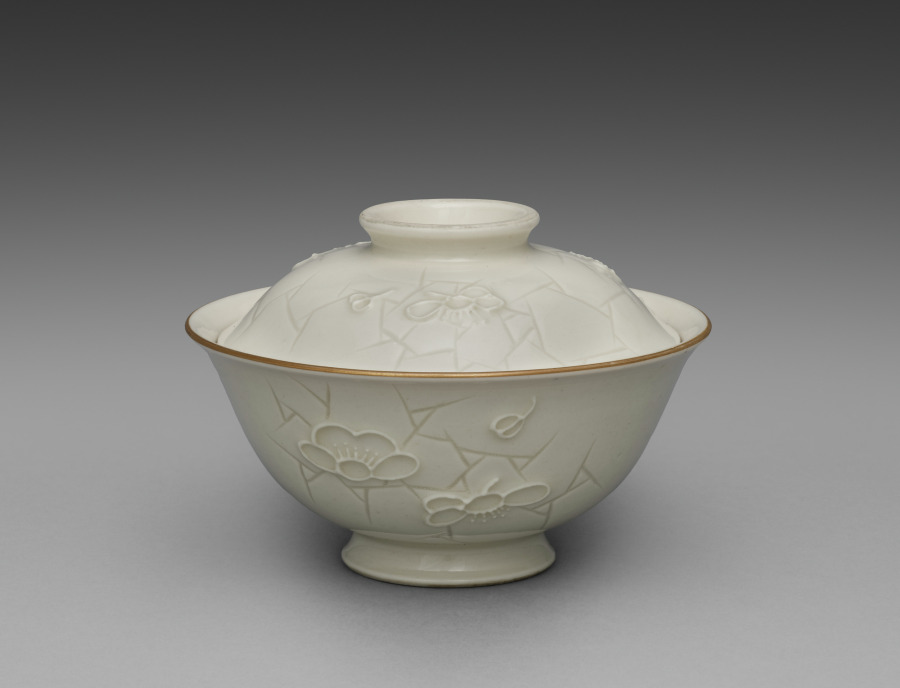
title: Covered Bowl from Dining Set with Plum Blossoms and Cracked-Ice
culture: Japan, Meiji period (1868–1912)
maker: Seifū Yohei II (Japanese, 1844–1878)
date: c. 1875–78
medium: Porcelain with molded designs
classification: Ceramic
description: Each item in this set has a delicate low-relief design of flowering plum branches over scattered, intersecting lines meant to resemble the cracked-ice surface of a frozen body of water and is signed on the base in gold pigment. While Yohei II produced many fine works in underglaze blue, like those produced by Kiyomizu Shichibei, he also made works in quite different styles later in his career, from the early 1870 s. In 1873, he was appointed purveyor to the Industrial Center of Kyoto Prefecture, a designation associated with Kyoto’s efforts to reach an international market through the port of Kobe; and from 1875 until his death, he was involved in national-level projects to present Japanese ceramics across the world. It was during this period that Yohei III was apprenticed to Yohei II, and it has been suggested that this set may in fact be an early example of Yohei III’s work, which he signed with his teacher’s name. Decorated with flowers resembling Japanese textile motifs, the set calls to mind the design of Yohei II’s pair of vases with plum blossoms in the Victoria and Albert Museum. Here, the elaborate trees created for a formal public exhibition setting have been translated into the approachable blossoms of the genteel domestic environment. While the designs are consistent across the pieces, each raised flower petal and pistil and each incised line in the ice was done by hand, so the cups, bowls, and dishes are similar yet unique. The bottoms of two boxes once identified the set’s owner, but the information has been deliberately obscured with black ink. However, inscriptions still visible appear to indicate two occasions, once at the end of July 1886 , and once again in June 1916 , when parts of the set were requested from Hokura in Niigata Prefecture. The location corresponds to a neighborhood in the present-day city of Jōetsu. The surname Tsuji 辻 also appears on a paper tag affixed to one of the box cloths. Future research may possibly reveal more about their provenance. A vase by Yohei III in a private collection combines the formal grandeur of the Yohei II vases in the Victoria and Albert Museum with the gentler design of this dining set, placing flowering plum trees against soft, scalloped-edge clouds resembling those in golden screens.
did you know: The dining wares have a creamy white coloration that the four boxes containing them identify as Korean in style.